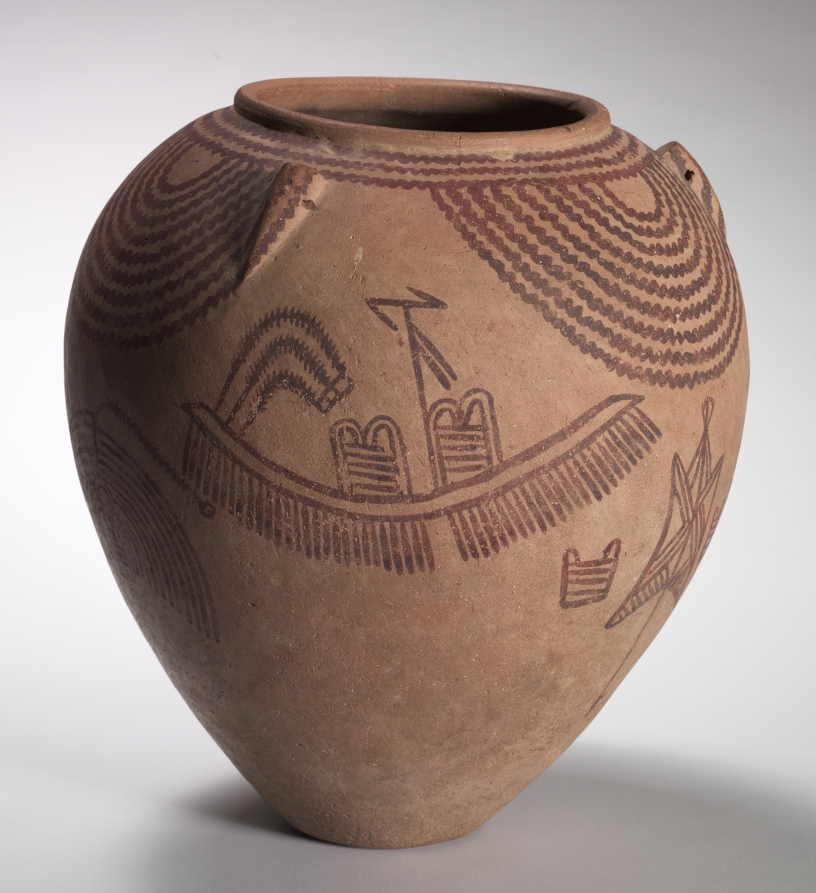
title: Decorated Jar with Boat Scenes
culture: Egypt, Predynastic (5000–2950 BCE), Naqada IIc–d (3650–3300 BCE)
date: c. 3300–3100 BCE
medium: marl clay pottery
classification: Vessels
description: The decoration painted on this jar shows two multi-oared boats traveling through fertile riverbanks lined with trees and aloe bushes. Rows of triangles indicate the desert hills in the background. The Nile was Egypt’s primary means of transportation and communication, since river traffic was far more efficient than travel by land. The concept of boat travel permeated all aspects of Egyptian life and religion. The sun god Ra was believed to travel by boat across the heavens by day and through the underworld by night. Funerary texts describe the trip to the afterlife as a journey by boat, and scenes of boats figured prominently in tomb decoration.